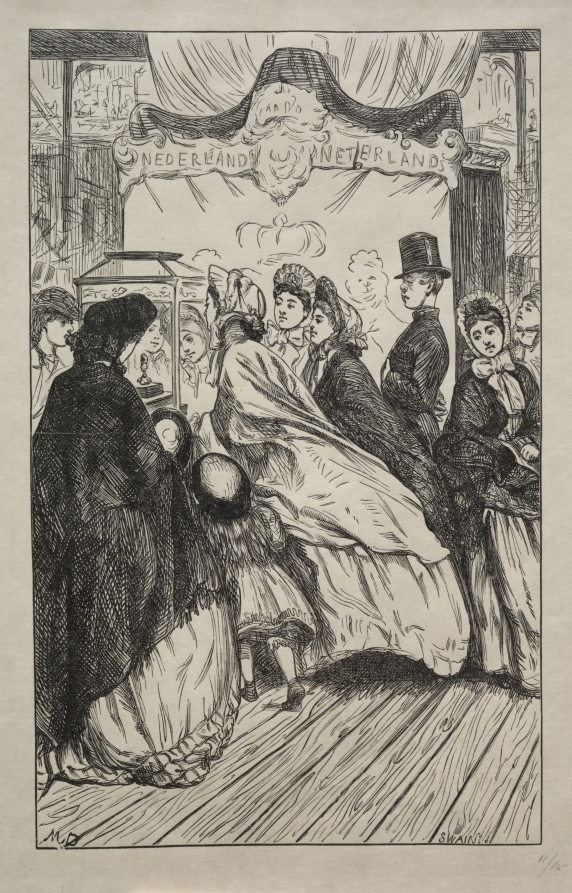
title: Jewels - At the Great Exhibition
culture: England, 19th century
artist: George Louis Palmella Busson Du Maurier (British, 1834–1896)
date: 1862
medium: wood engraving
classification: Print